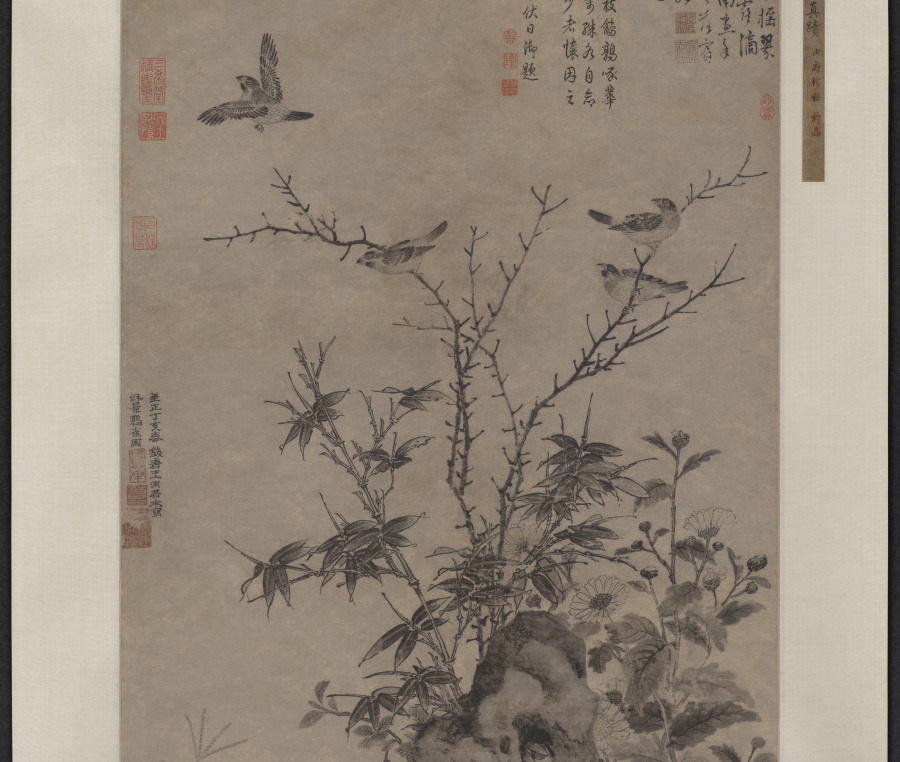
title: Quails and Sparrows in an Autumn Scene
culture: China, Yuan dynasty (1271-1368)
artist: Wang Yuan (Chinese, c. 1299-after 1366)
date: 1347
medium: hanging scroll, ink on paper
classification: Painting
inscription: 至正丁亥春 錢塘王淵若水寫秋景鶉雀圖 [印] 澹轩; [印] 若水; [印] 墨妙筆精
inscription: 翦翦輕風搖翠葆，團團清露滴金叢。 劍南畫手今何在，冷落賓榔枸杞新。 鐵篴 [印] 杨维桢印; [印] 廉夫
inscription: 1 inscription and 10 seals of the Qianlong emperor (r. 1736-95)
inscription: 4 seals of Zhang Heng 張珩 (1915-1963)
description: The flower-and-bird subjects here are depicted in a meticulous manner, echoing the academic tradition but translating the customarily colored images to plain monochrome. Fine ink lines combined with carefully graded washes define the contours and give subtle modeling to the natural forms. Wang Yuan excelled in flower-and-bird subjects as well as landscape and figure paintings. A child prodigy, he was instructed by the great Yuan master Zhao Mengfu at an early age.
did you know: Wang Yuan was from Qiantang, today’s Hangzhou in eastern China.